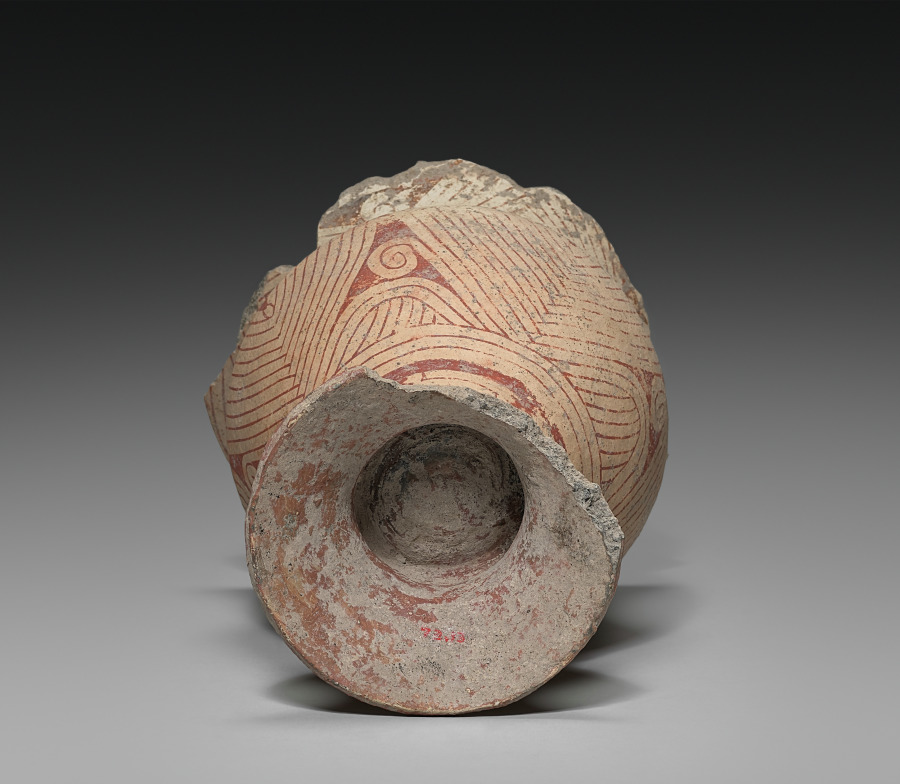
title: Jar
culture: Thailand, Ban Chiang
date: 300 BCE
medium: earthenware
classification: Ceramic